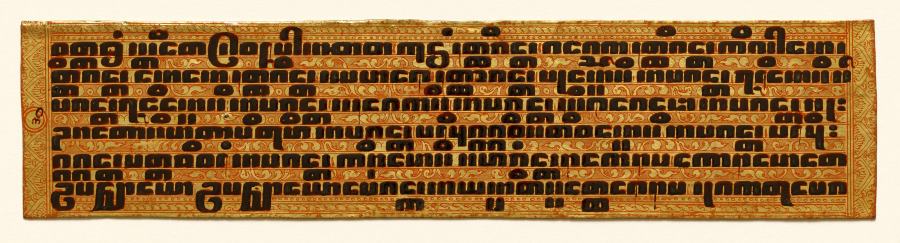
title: Text, folio 4 (verso) from a Kammavacha: Buddhist ordination text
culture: Myanmar (Burma)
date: 1800s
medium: Leaf: lacquer and gilding on cloth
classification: Manuscript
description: In premodern Burma, lay people commissioned lavishly ornamented manuscripts for ceremonial occasions, when officiants would read aloud from the text. Written in black lacquer, the text is in the language of Pali written in a Burmese script. It contains ordination rites and procedures for monastic ceremonies. The second to last page is covered with intricately drawn, winged celestial beings (nats) in gestures of praise. They fly amid intertwining vegetation—denoting bounty—that grows from serpentine forms that refer to rain clouds. Lionlike forms inhabit the space with them. The top and bottom covers are equally ornamented with jeweled floral patterning.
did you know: The Pali text of this manuscript is written in Burmese square script, which is also known as "tamarind seed script."